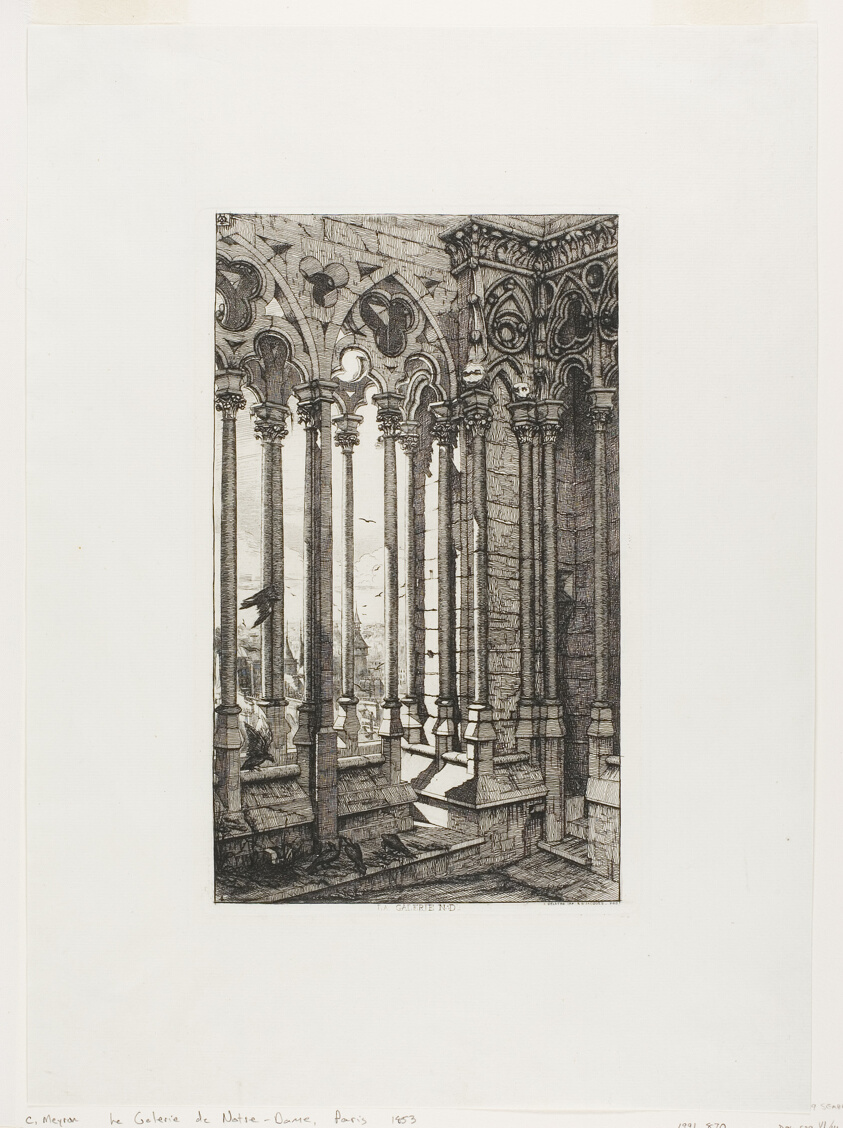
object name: Print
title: The Gallery of Notre-Dame, Paris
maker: Charles Meryon (French, 1821-1868)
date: 1853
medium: Etching and engraving on ivory laid paper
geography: France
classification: etching; print; prints and drawing